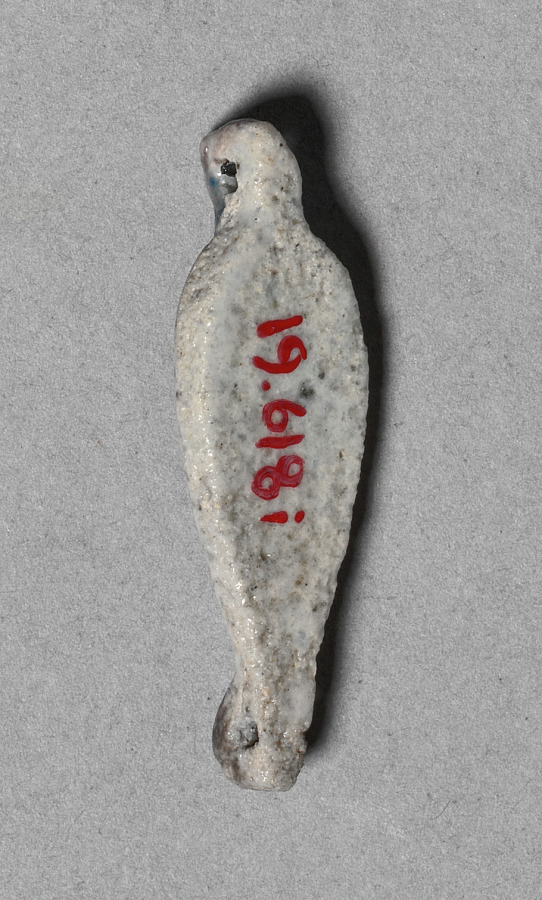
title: Petal-Shaped Bead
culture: Egypt, New Kingdom (1540–1069 BCE), Dynasty 18, reign of Amenhotep III (1390–1352 BCE)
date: c. 1391–1353 BCE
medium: faience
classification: Jewelry